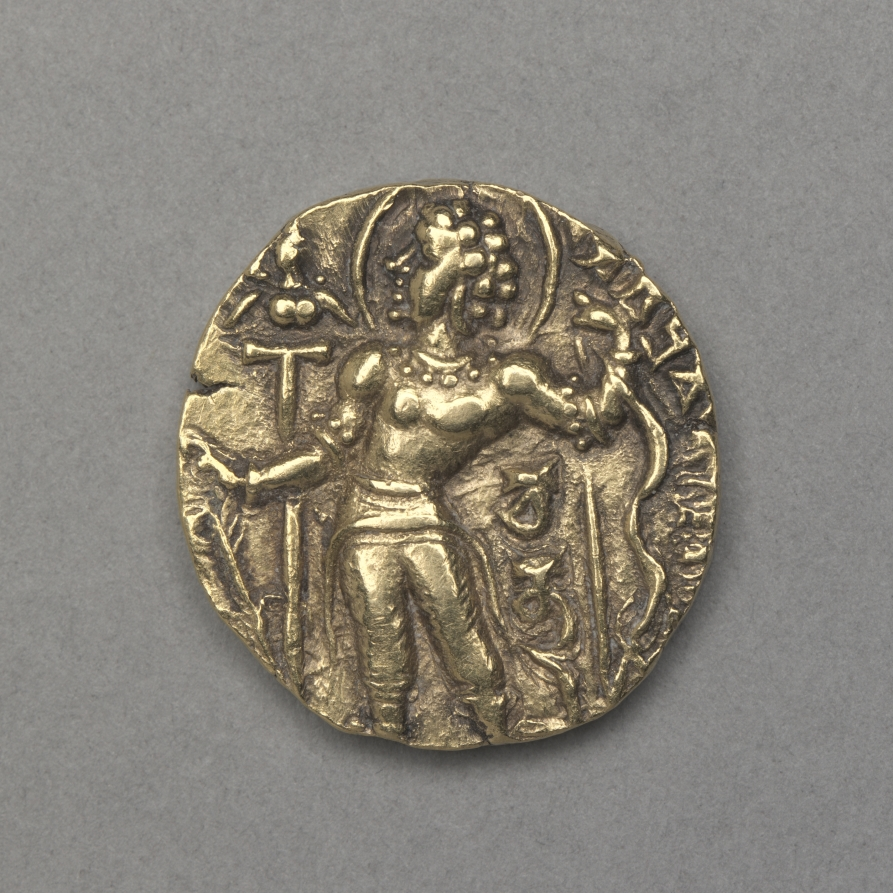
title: Coin with Figure of an Archer (obverse)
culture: India, Chandragupta II, Gupta Period, late 4th-early 5th century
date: c. 400 CE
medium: gold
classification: Coins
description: The rulers of the Gupta dynasty unified northern India under native rule for the first time since the Maurya empire (323-185 bc). The Guptas named themselves after Chandragupta, the founder of the Maurya dynasty. This coin of Chandragupta II, who ruled from around ad 380 to 415, depicts a divine archer holding a bow and arrow. On the reverse is the Indian goddess of good fortune, Shri, seated on a lotus.